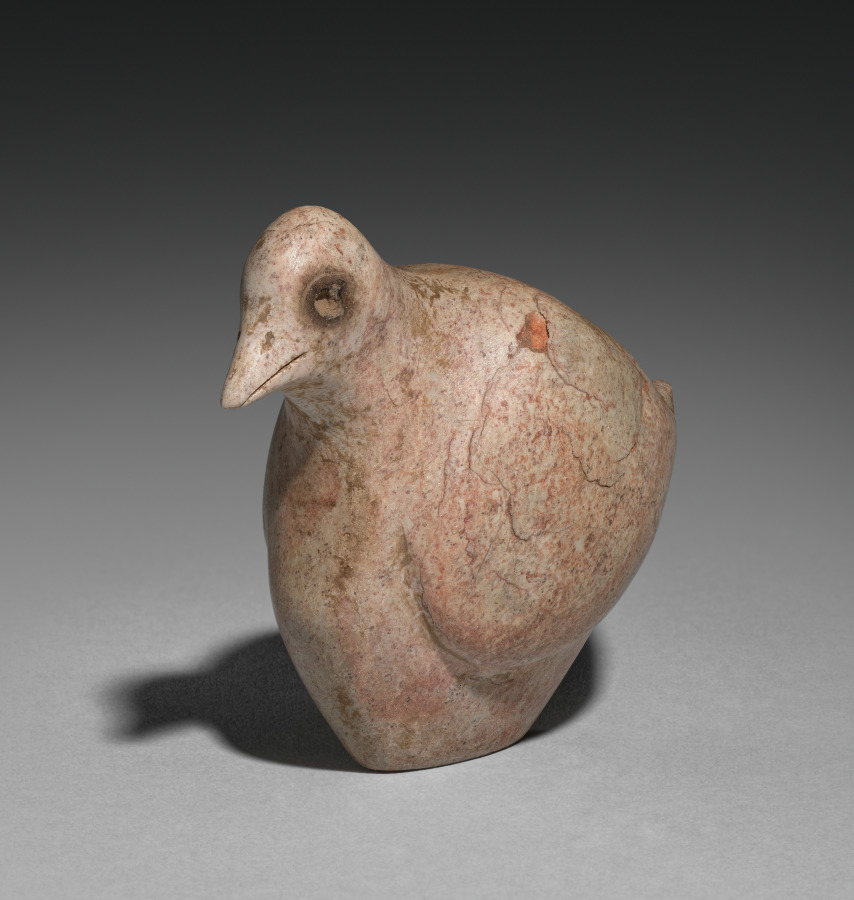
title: Nesting Quail Stamp Seal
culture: Iran, Lake Van region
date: 4000–3000 BCE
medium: dickite stone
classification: Sculpture